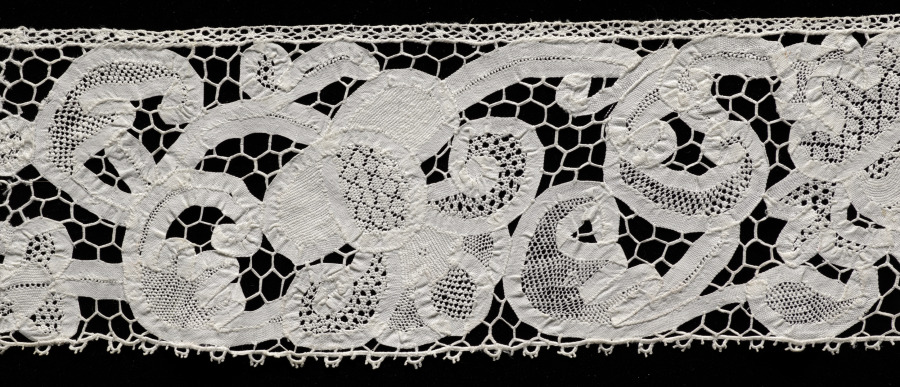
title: Lace Edging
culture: Italy, Genoa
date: 1700s–1800s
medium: Linen: needle lace and bobbin lace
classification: Lace